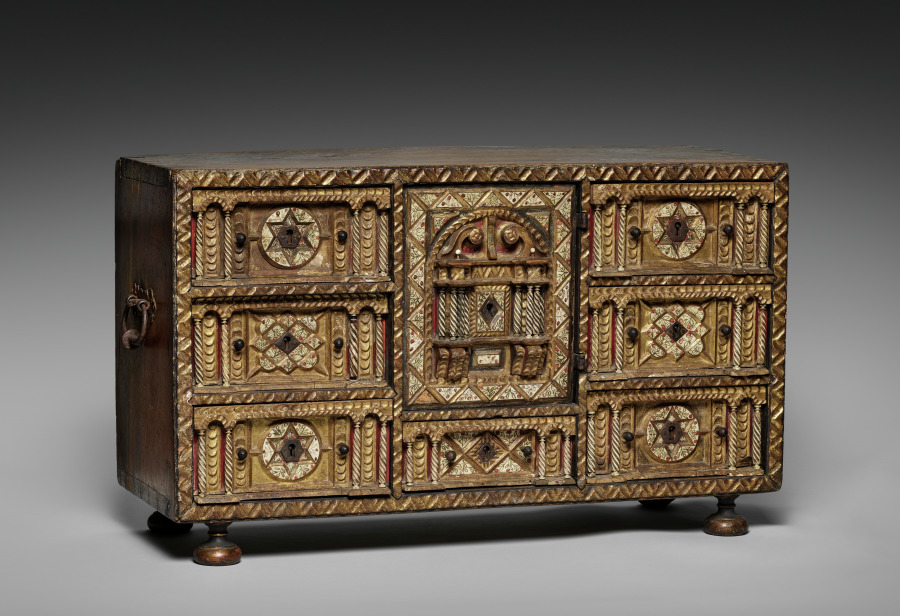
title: Chest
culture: Spain, Colonial, late 17th Century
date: late 1600s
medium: turned and joined wood, gilded and painted red with applied bone columns and bone inlays, wrought iron hardward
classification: Furniture and woodwork